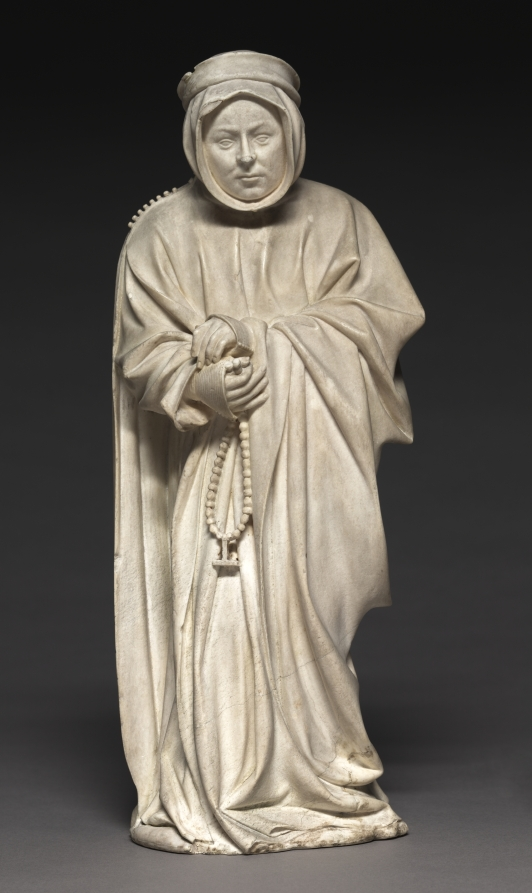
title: Mourner from the Tomb of Philip the Bold, Duke of Burgundy (1364–1404)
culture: Netherlands, active Dijon, 15th century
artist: Claus de Werve (Netherlandish, 1380–1439)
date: 1404–1410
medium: vizille alabaster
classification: Sculpture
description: This figure comes from the tomb of Duke Philip the Bold from the church of Champmol near Dijon (Burgundy, France). Philip, who founded the monastery and designated it as his burial place, hired the best artists, many of whom came from the Netherlands. While the commission was given in 1381, the work was not completed until 1410, six years after the duke’s death. This mourner is unusual for the time because it is not carved as a static low relief on the pedestal of the tomb but interacts with the viewers and their fellow procession members. The lifelike quality of the figure is due in large part to the alabaster. Its softness allowed artists to carve details into the material, and the transparent, milky white stone could also be polished to a high gloss.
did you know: During his life, Duke Philip founded the monastery of Chartreuse de Champmol to serve as a final resting place for himself and his family.